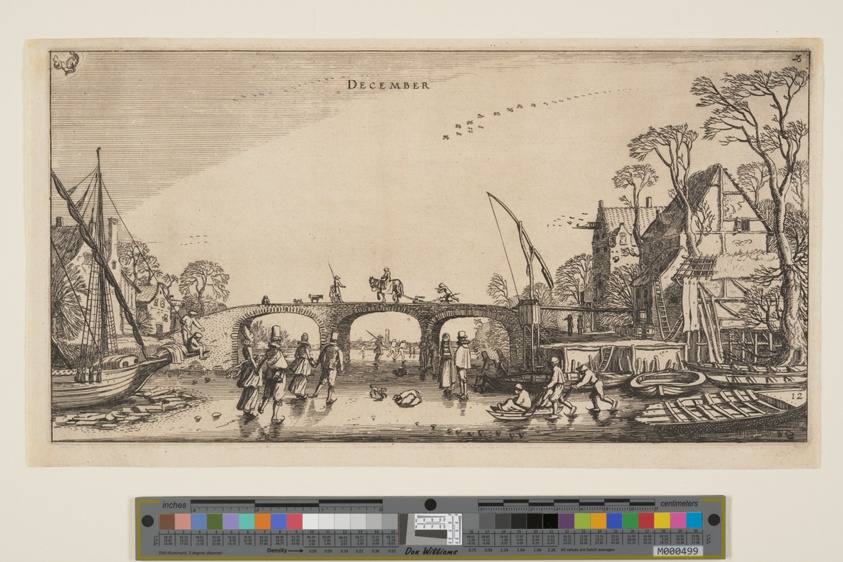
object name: Print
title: December, from The Twelve Months of the Year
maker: Jan van de Velde II (Dutch, c. 1593–1641); after Willem Buytewech (Dutch, c. 1591–1624)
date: 1616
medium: Etching on ivory laid paper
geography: Netherlands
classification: etching; paper; print; prints and drawing